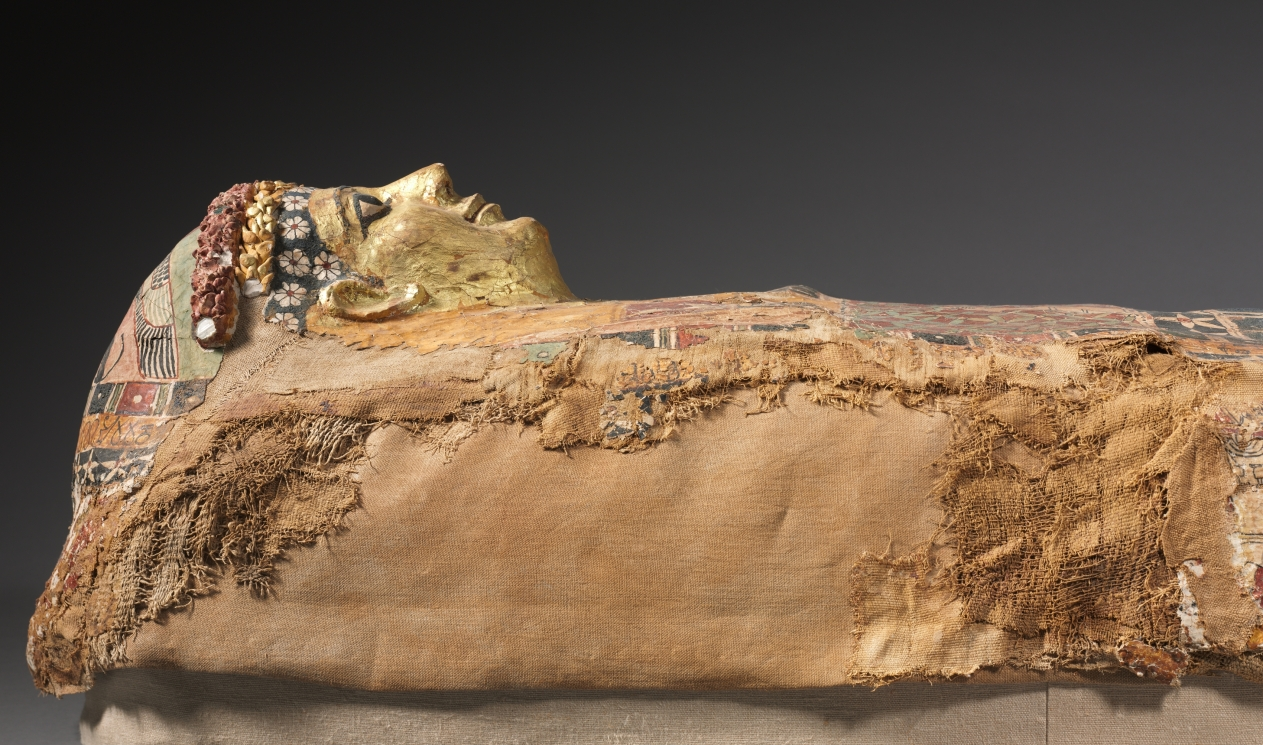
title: Cartonnage Mummy Case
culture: Egypt, Greco-Roman period (332 BCE–395 CE), Ptolemaic dynasty (305–30 BCE)–Roman empire (30 BCE–395 CE)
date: c. 50 BCE–50 CE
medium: cartonnage, painted and gilded, with glass inlays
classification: Funerary Equipment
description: This mummy case is made of cartonnage, a material similar to papier-mâché, but using layers of linen rather than paper. Cartonnage mummy cases such as these are contemporary with funerary portraits painted on wood or linen, although they present a very different appearance. The face, modeled in plaster, is bland and idealized, although the effect of the gilding and glass inlays is quite dazzling. The body is painted with traditional, age-old funerary motifs: the god Osiris, seated and mummiform; the fetish of Abydos, holy city of Osiris, flanked by standing deities (Thoth and Shu); a Horus falcon with outspread wings, and the bark of Sokar. Below these are the sandaled feet of the deceased. On the sides are rows of seated deities. On the top of the head are a winged scarab beetle flanked by Anubis jackals. On the foot are painted the soles of the deceased’s sandals, flanked by scorpions for protection.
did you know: This coffin is smaller and later in date than the other coffins in this gallery. It is made of cartonnage, which used layers of linen to create a material similar to papier-mâché. The painted portrait head displays the influence of Roman portraiture at this time and incorporates both gilding and glass inlays. Despite the fragile materials, this mummy case survived due to the very dry desert climate in which it was found.